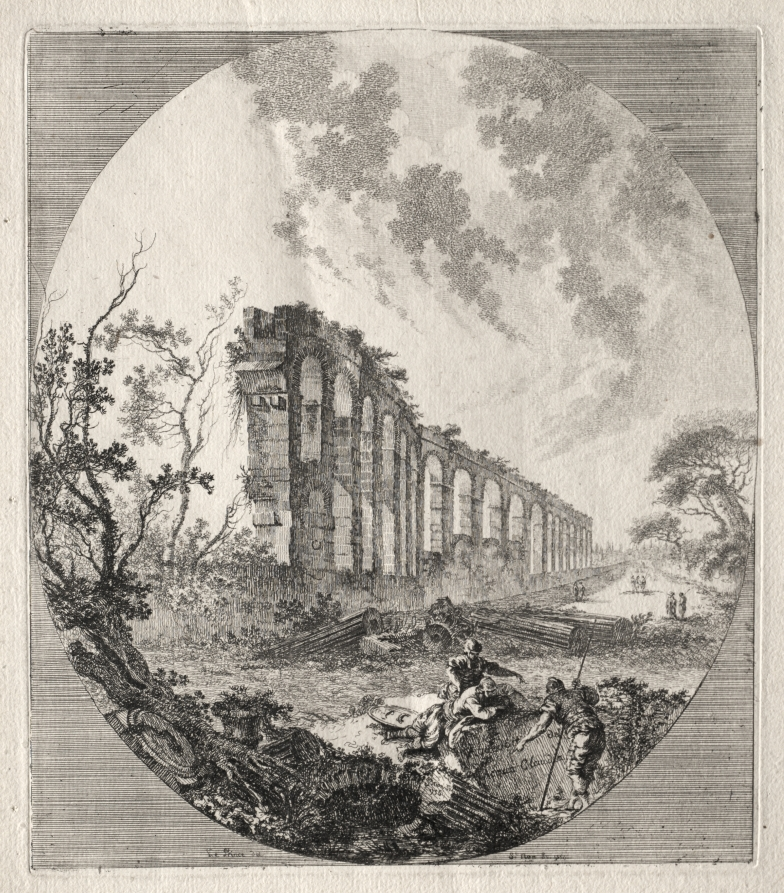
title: Ancient Ruins: Ancient Aqueduct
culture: France, 18th century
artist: Jean-Claude-Richard de Saint-Non (French, 1727–1791)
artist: after Jean Baptiste Le Prince (French, 1734–1781)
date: 1756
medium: etching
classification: Print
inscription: Saint-Non became a priest in deference to his parents' wishes, but from 1752 his interest turned to art, and he began to etch in 1753. He went to Italy in the 1750s to study classical monuments, sculpture, and the landscape-a necessary trip for artistic training in the 18th century. This image of an ancient Roman aqueduct demonstrates the taste for representations of picturesque ruins. The grass-covered monument, centered in the decorative oval composition, is identified in a clever manner: "Aquedott del Acqua Claudia" is inscribed on the large piece of stonework discovered by the trio of soldiers at the lower right.